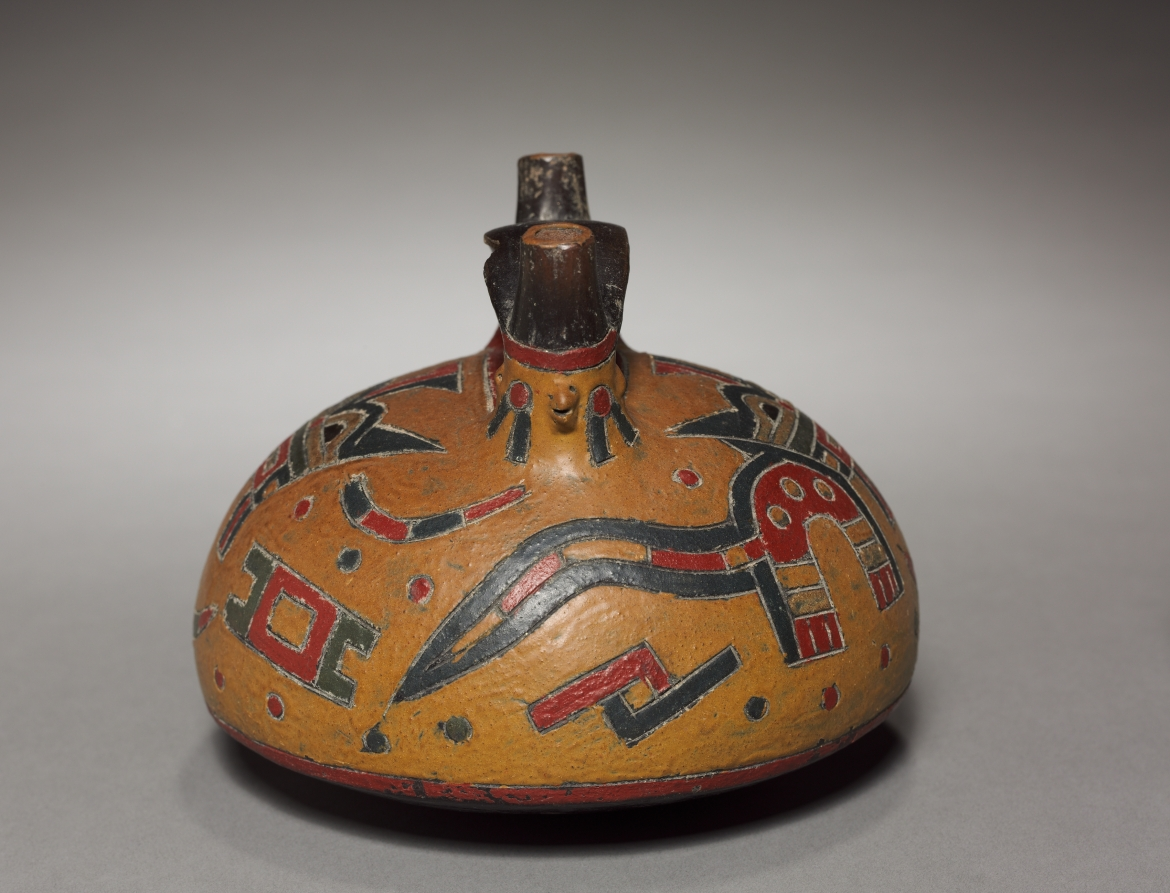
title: Vessel with Feline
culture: Peru, South Coast, Paracas (Cavernas) style (700 BCE–1 CE)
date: 700 BCE–1 CE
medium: earthenware, resin-based paint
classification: Ceramic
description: Little is known of the meaning of the beautifully abstracted felines so often incised on Paracas ceramics. The designs achieve much of their complexity through color applied as resin-based paint after the vessel was fired in a smoky atmosphere that blackened its surface. Two spouts joined by a bridge appear on many fine South Coast ceramics. The form probably had meaning, now lost.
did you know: Small, wild, reclusive felines, pampas cats live on the margins of agricultural fields, where they prey on rodents and other pests that are a farmer’s bane